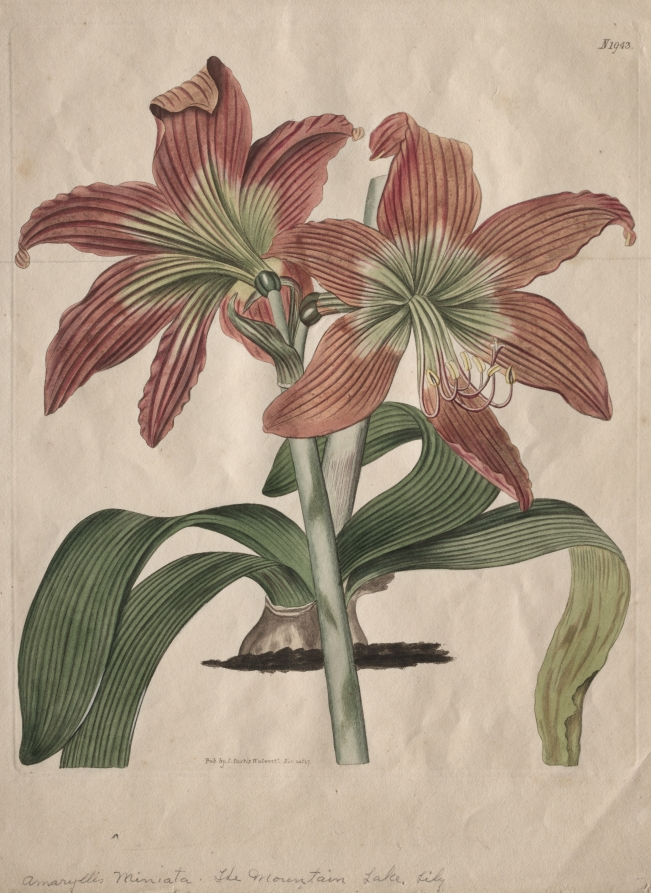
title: The Botanical Magazine or Flower Garden Displayed: The Mountain Lake Lily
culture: England, 19th century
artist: S. Curtis (British)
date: 1827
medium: engraving, hand-colored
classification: Print